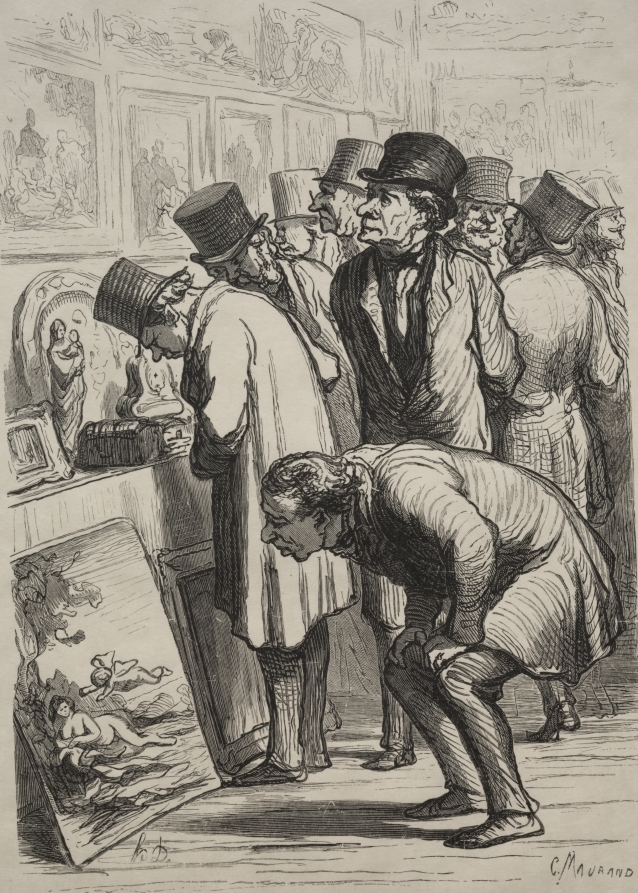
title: Gallery at Hotel Drouot: The Day of the Sale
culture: France, 19th century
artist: Honoré Daumier (French, 1808–1879)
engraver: Charles Maurand (French, 1824–1904)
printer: François Louis Schmied (Swiss, 1873–1941)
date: 1862, printed 1920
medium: wood engraving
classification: Print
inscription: Lower margin, pencil: 42/75 ; red stamp: FLS